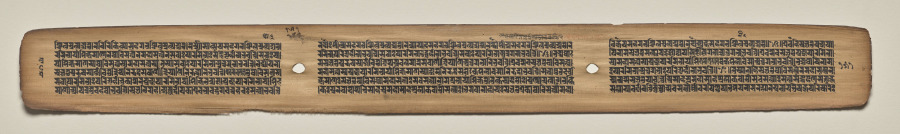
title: Text, Folio 151 (verso), from a Manuscript of the Perfection of Wisdom in Eight Thousand Lines (Ashtasahasrika Prajnaparamita-sutra)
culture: Eastern India, Bihar, Vikramashila Monastery. Painting: Nepal, Kathmandu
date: Sunday, September 14, 1119 (year 239 of the Newar Samvat in the month of Ashvina)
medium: gum tempera and ink on palm leaves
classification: Painting